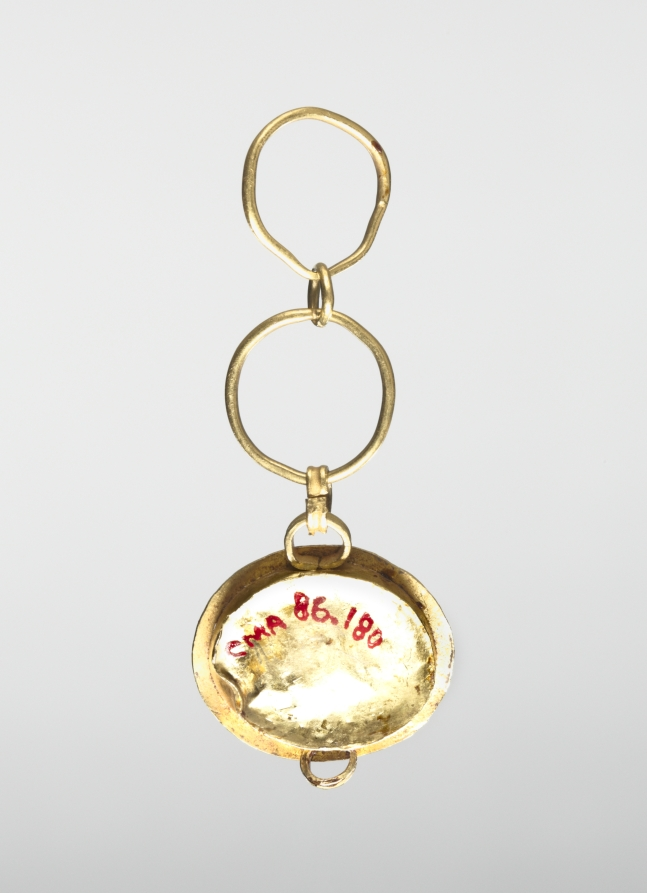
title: Intaglio: Victory in a Chariot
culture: Italy, Roman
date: 1–200 CE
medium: red jasper in gold mount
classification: Jewelry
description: This oval jasper gemstone is incised with a scene of the goddess Victory in a chariot being pulled by four galloping horses. The horses’ hind hooves all touch a curved ground line at the bottom of the composition. The stone is set in a gold mount with toothed edges holding it in place, attached by a loop to two additional gold rings.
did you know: Winged Victory, or Nike, is shown riding a four-horse chariot, likely a good luck charm for the owner.